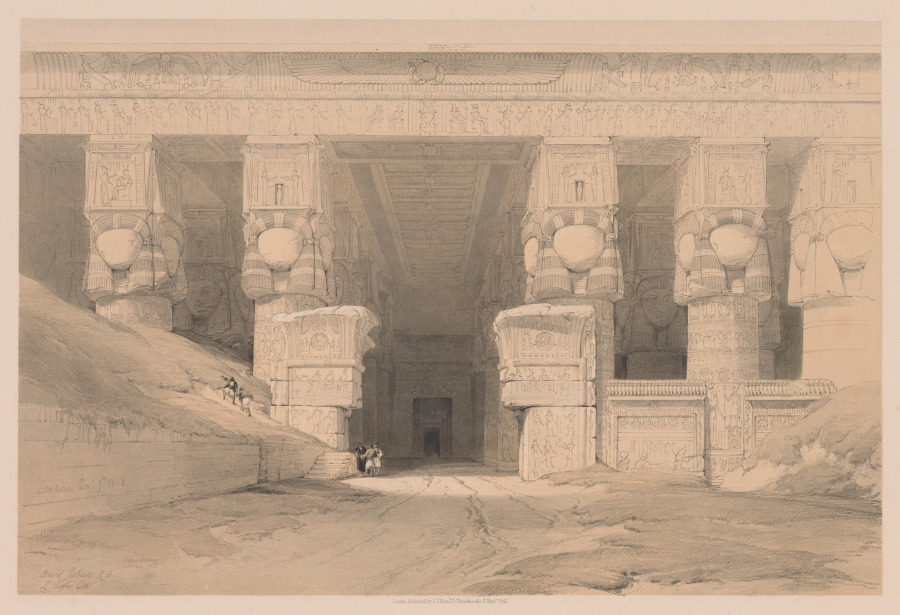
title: Egypt and Nubia: Volume I - No. 35, Dendera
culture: England, 19th century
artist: Louis Haghe (British, 1806–1885)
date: 1838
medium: color lithograph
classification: Print